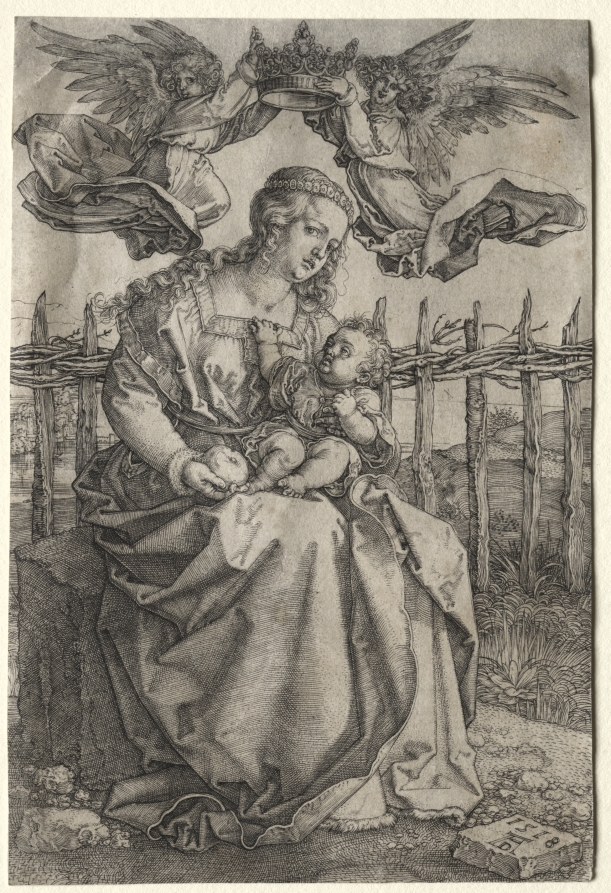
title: The Virgin Crowned by Two Angels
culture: Germany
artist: Albrecht Dürer (German, 1471–1528)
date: 1518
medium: engraving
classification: Print